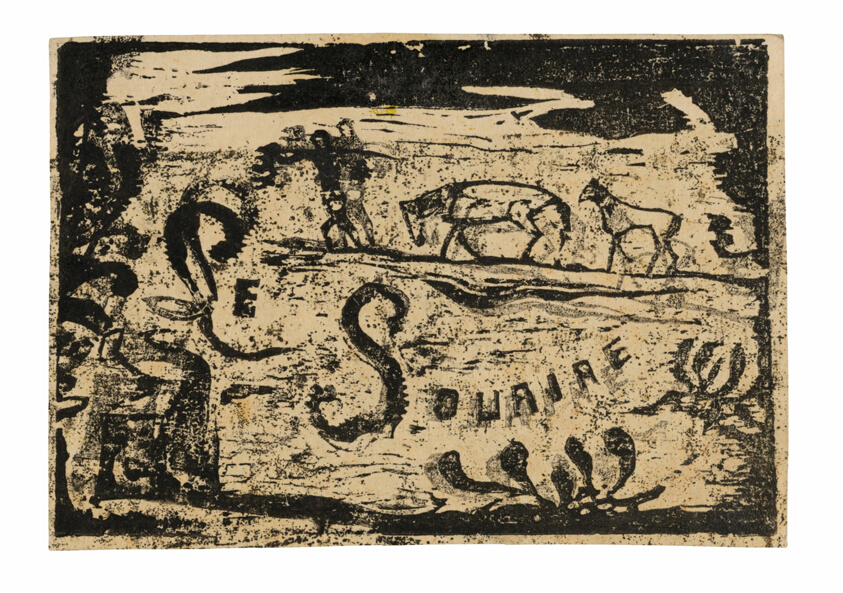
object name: Print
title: Man Carrying Bananas Followed by Two Horses, headpiece for Le sourire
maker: Paul Gauguin (French, 1848-1903)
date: 1900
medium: Wood-block print printed twice in black ink on cream wove paper (an imitation Japanese vellum) (recto); wood-block print in black ink over orange ink tone block, on cream wove paper (an imitation Japanese vellum) (verso)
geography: France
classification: woodcut; print; prints and drawing